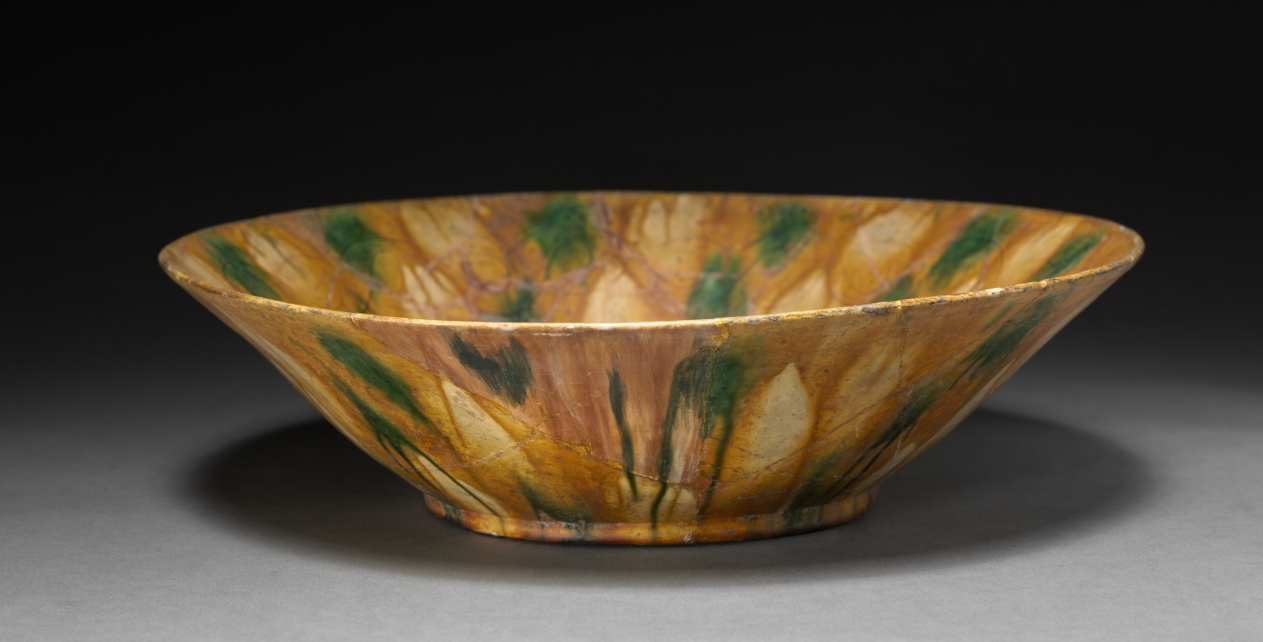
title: Bowl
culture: Iraq or Iran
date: 800s–900s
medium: earthenware with painted underglaze and incised design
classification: Ceramic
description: This large bowl with flaring sides is splashed with yellow, brown, and green pigments, which have run during the firing process, in imitation of Tang Chinese ceramics.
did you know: Look closely: the bowl has incised decoration of a large palmette in the center and a split-leaf scroll pattern just inside the rim.